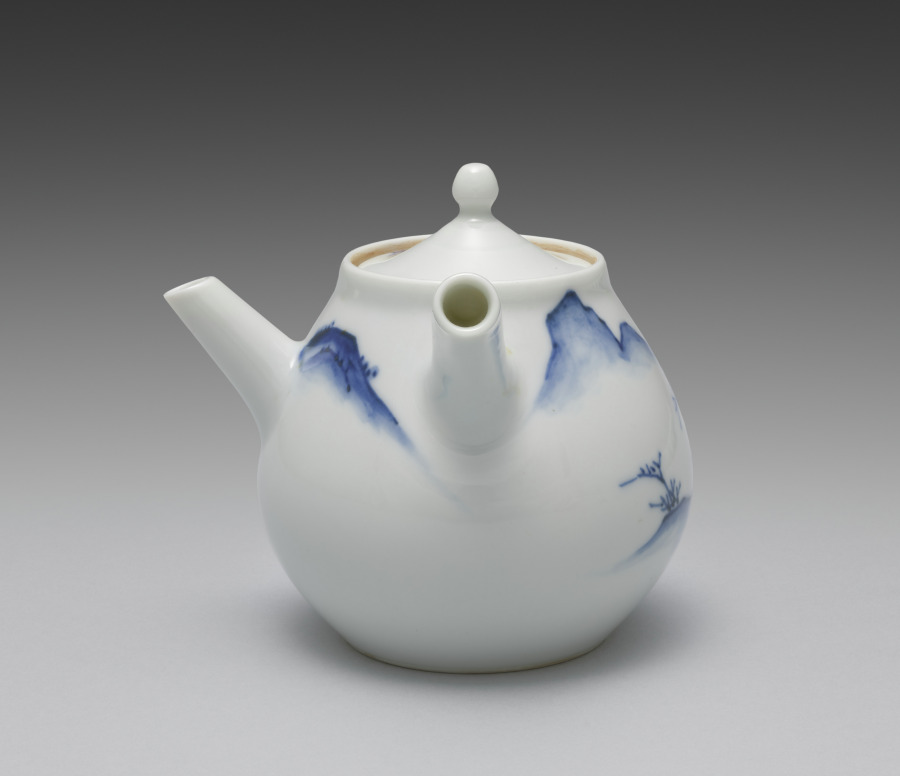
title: Teapot from Tea Set with Chinese Landscape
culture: Japan, Meiji period (1868–1912)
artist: Seifū Yohei III (Japanese, 1851–1914)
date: 1893–1914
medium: Porcelain with underglaze blue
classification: Ceramic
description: This tea set with idyllic lakeside Chinese landscapes has a side-handled pot called a kyūsu, used for steeping, straining, and serving tea. Unlike some others, this set also has a yuzamashi, a container used to cool boiled water to just the right temperature for the best flavor when steeping. Seifū Yohei III’s painting teacher, Tanomura Chokunyū (1814–1907), made a visual record of famous sencha events that shows how these kinds of porcelains fit with objects such as a stove and kettle to form a complete set of utensils for tea preparation, and with ensembles of decorative objects meant to inspire creativity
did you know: The teapot depicts two friends playing a board game on a promontory beyond a two-storied residence, while another figure comes across the entry bridge bearing bags of provisions, hung from the ends of a pole balanced across his shoulders.